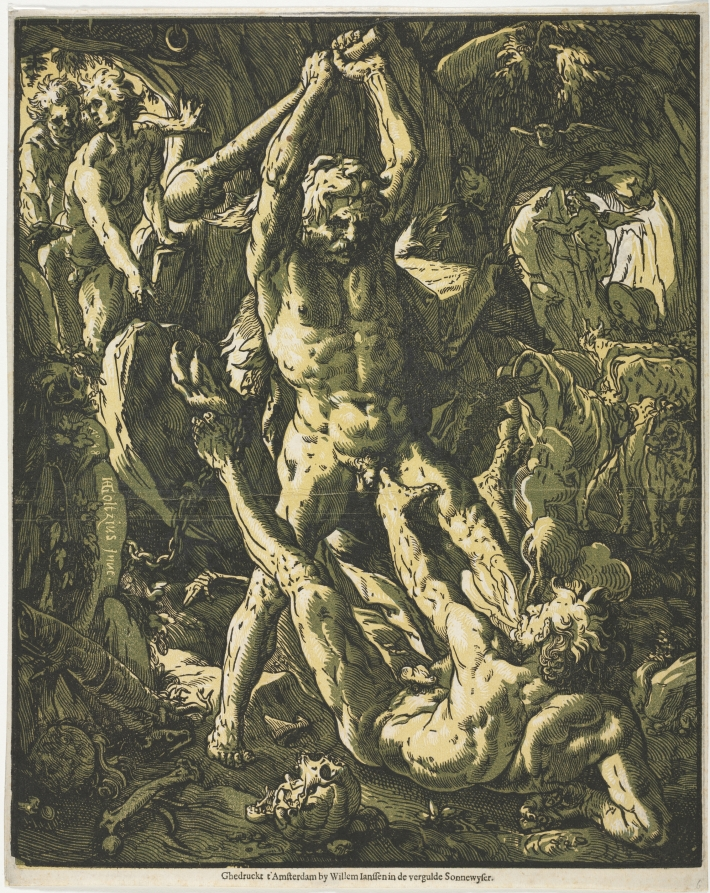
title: Hercules and Cacus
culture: Netherlands, 16th century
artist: Hendrick Goltzius (Dutch, 1558–1617)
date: 1588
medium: chiaroscuro woodcut (in black, green, and yellow)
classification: Print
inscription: center left, in block (green): A°88 HG[in monogram]oltzius Inve.[sidesways] ; across bottom, letterpress: Ghedruckt t'Amsterdam by Willem Ianffen in de vergulde Sonnewyser. ; lower right, in graphite: 6 ; VERSO, upper left, in graphite: 4 ; by Joseph-Marius Agassis, lower right, in pen and purple ink: [monogram, Lugt 69]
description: This chiaroscuro woodcut portrays Hercules’s heroic battle against Cacus, a murderous, flame-breathing giant. Cacus has fallen onto the bones of his victims. As a last defense, he blows fire at Hercules, who heaves his club overhead to strike a deadly blow. Goltzius portrayed the lead-up to the fight in the background, where Hercules rolls away a boulder at the cavern’s entrance, setting free a small herd of cows that Cacus had stolen. The vivid color combination of yellow and olive green helps energize this dramatic moment.